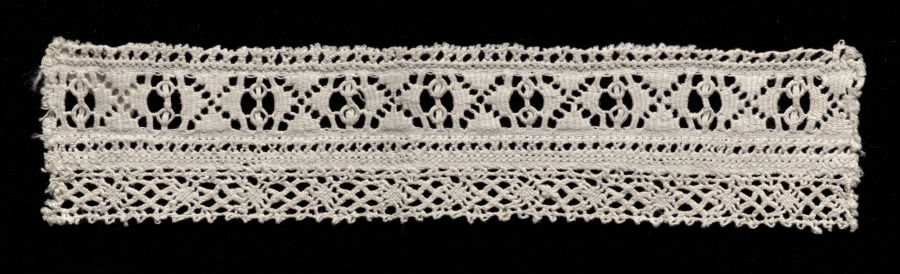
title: Lace fragment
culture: Italy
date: 1500s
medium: Linen: needle lace (drawnwork) insertion and bobbin lace edging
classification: Lace